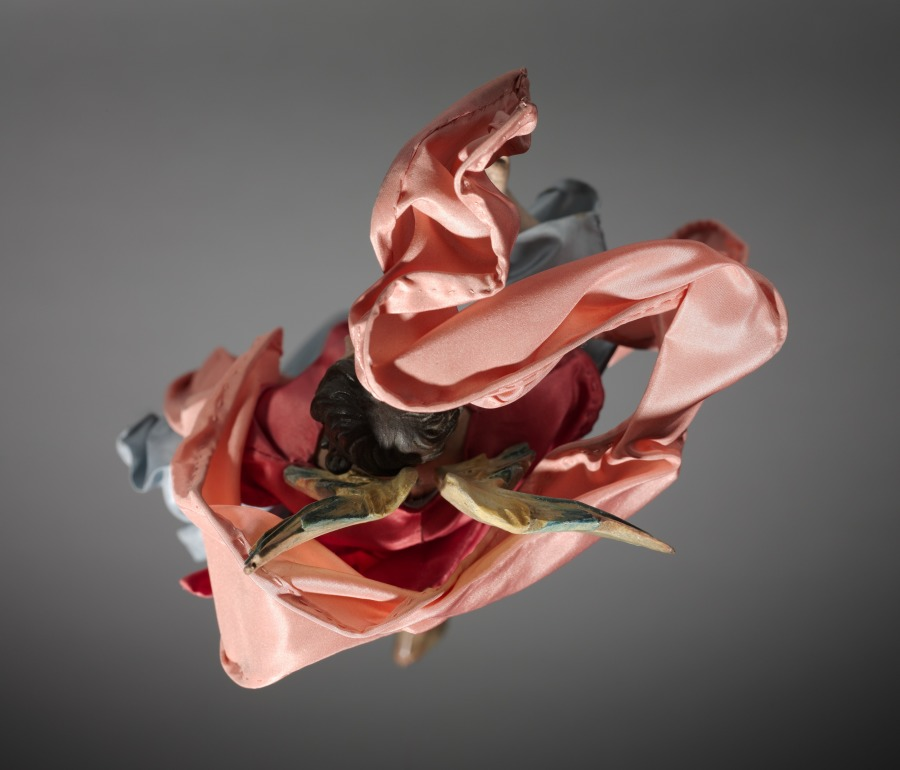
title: Figure from a Crèche: Angel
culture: Italy, Naples, late 18th-early 19th century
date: 1780–1830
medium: painted wood and terracotta with various textiles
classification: Sculpture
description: The practice of creating scenes of the Nativity for the home dates from the early 1700s in Italy, where people began to set up doll-like figures of about a foot or less in height. The custom was particularly popular in Naples around 1800, where crèche scenes (crèche means cradle, or crib) included many figures, whose heads and hands of painted terracotta, stuffed cloth bodies, and clothing adapted from contemporary local costumes gave them an amazingly realistic character. Representations of the birth of Jesus can be traced to the first few centuries of Christianity. Both living creatures and sculptural depictions of them were used from early times. By the late middle ages it was customary to create life-size figures of wood or stone, naturalistically painted, to represent the characters who participated in the events of Jesus's early life. These sculptures were then arranged in scenes illustrating one or both of the most important of these events, the Adoration of the Shepherds and the Adoration of the Magi-the three kings from the East who came to pay homage to the Christ child. Used in churches, these large figures were especially popular in Italy, Central Europe, Spain, and Portugal.